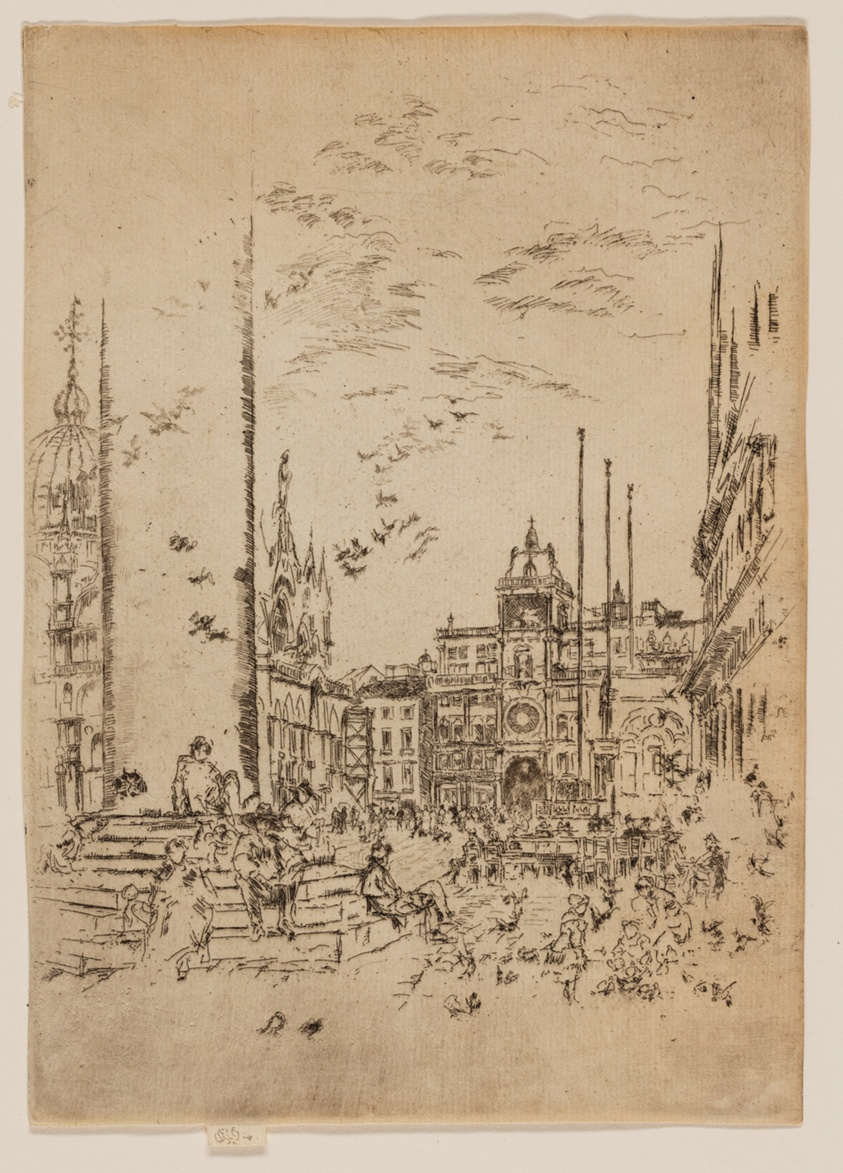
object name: Print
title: The Piazzetta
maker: James McNeill Whistler (American, 1834-1903)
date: 1879/80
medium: Etching and drypoint with foul biting in black ink on cream laid paper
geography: United States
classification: etching; foul biting; print; prints and drawing; paper; drypoint